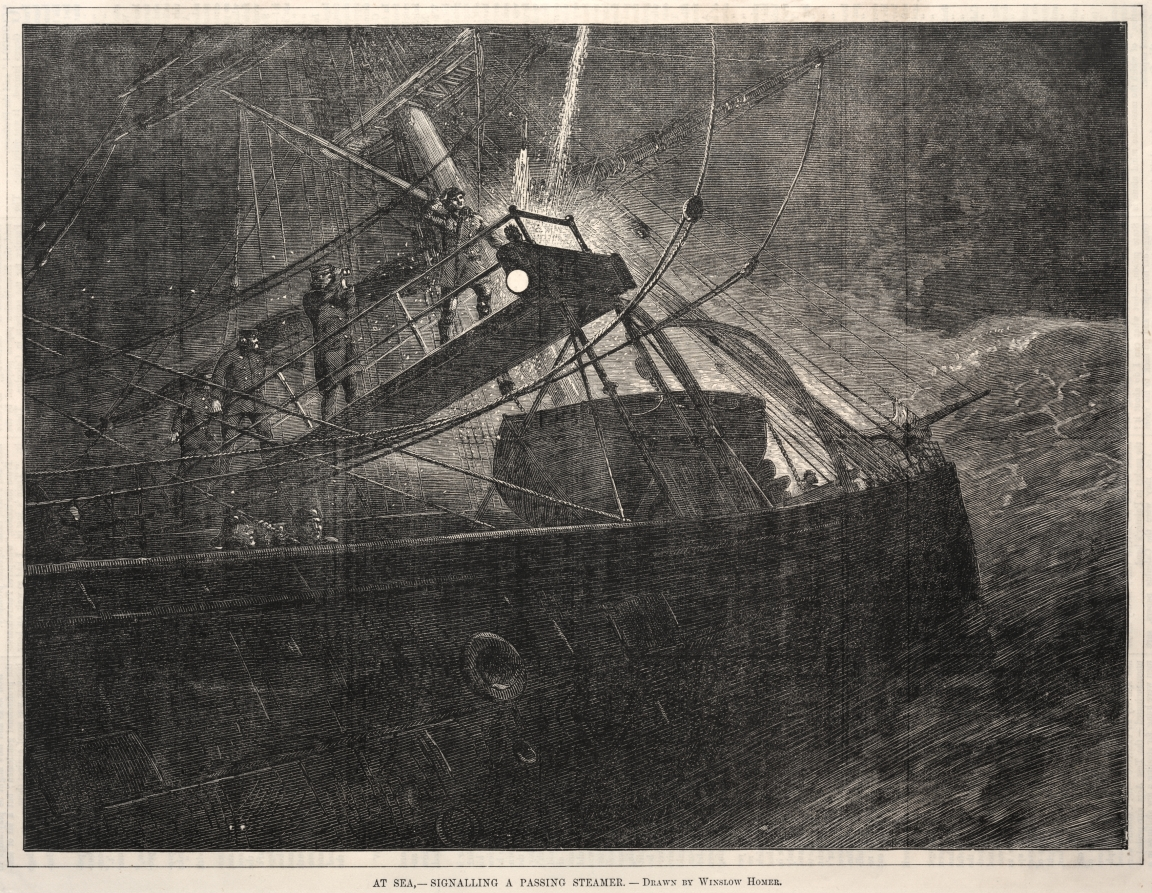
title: At Sea, Signalling a Passing Steamer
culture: America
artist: Winslow Homer (American, 1836–1910)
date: 1871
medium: wood engraving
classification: Print